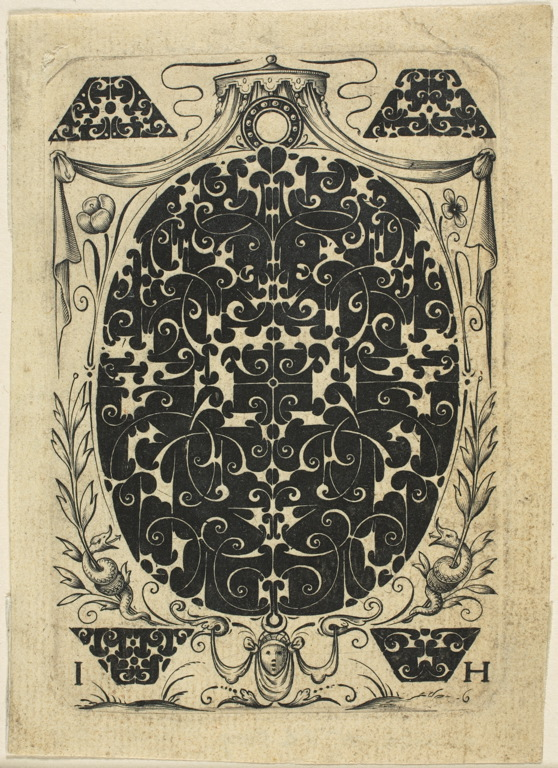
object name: Print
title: Ornamental Plate II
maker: Jacques Hurtu (French, flourished 1614-19-died before 1623)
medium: Engraving on paper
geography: France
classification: engraving; print; prints and drawing